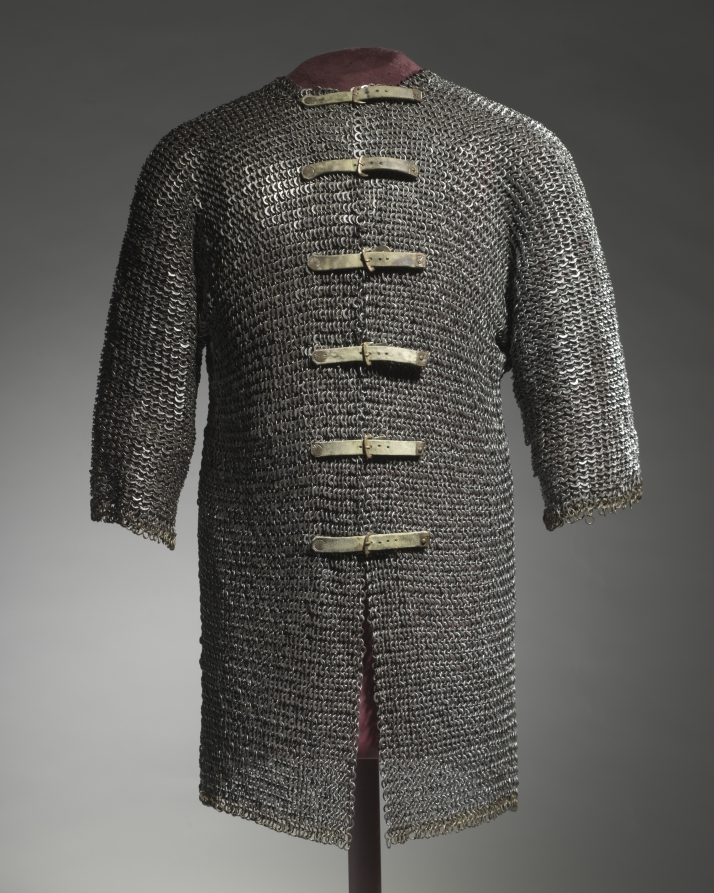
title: Hauberk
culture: Germany (?)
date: c. 1400–1450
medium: steel and brass rings, riveted with modern buckles and straps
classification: Arms and Armor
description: Mail armor was the predominant form of metal body defense for European knights until about 1350. The term derives from the Old French word maille (mesh), implying a protective textile. Each mail garment was constructed of small linked metal rings and "woven" for a specific part of the body. Mail for the torso is a hauberk and typically reached mid-thigh.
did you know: Mail was expensive to make and generally only available to warriors of noble birth unless it could be obtained as war booty.